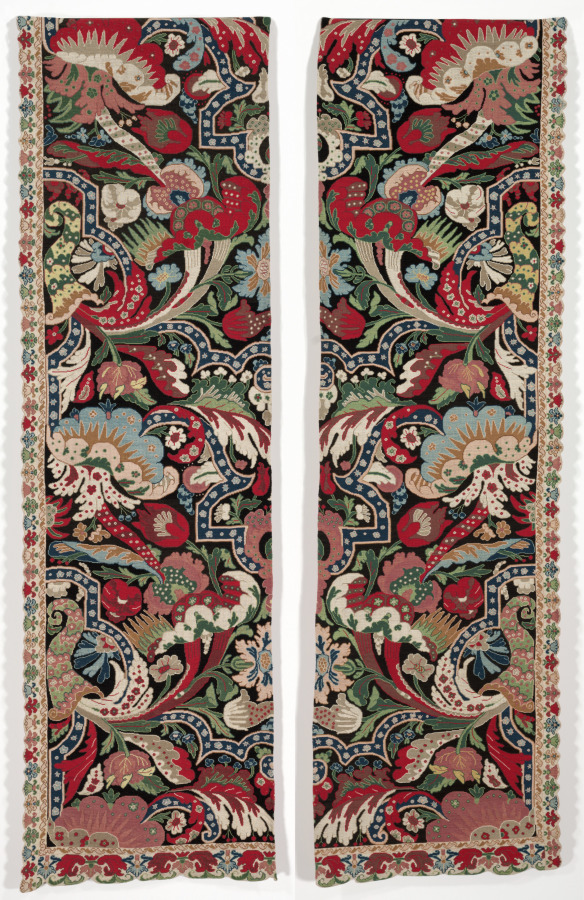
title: Pair of Needlework Bed Hangings in the Bizarre Style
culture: France, 18th century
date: 1710–20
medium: Silk, wool: needlework, tent and cross-stitch embroidery on canvas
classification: Embroidery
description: These panels would have hung originally around a bed post as part of a full set of hangings on a bedstead in the early 1700's. Elaborate textile hangings were a conspicuous display of wealth since many ladies received their friends within their bedchamber. A full set enveloped the entire bedstead and, when closed, helped retain warmth long after the fire had gone out. This particular pair of panels is remarkable in that they represent many hours of highly skilled needlework. Their design is known as a "bizarre" pattern, which mimicked woven silks of the same era that were asymmetrical, boldly stylized adaptations of Asian fabrics that were coming into the European market from the trading routes at the time.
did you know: The design of this pair of needlework panels is known as a "bizarre" pattern.